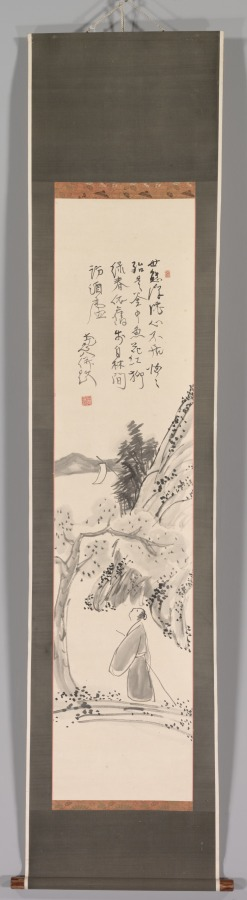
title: Casually Created on a Spring Day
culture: Japan, Edo period (1615–1868) to Meiji period (1868–1912)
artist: Murase Taiitsu (Japanese, 1803–1881)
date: c. 1825–81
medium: hanging scroll; ink on paper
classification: Painting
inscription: artist's inscription, signature, and seal at top of painting.